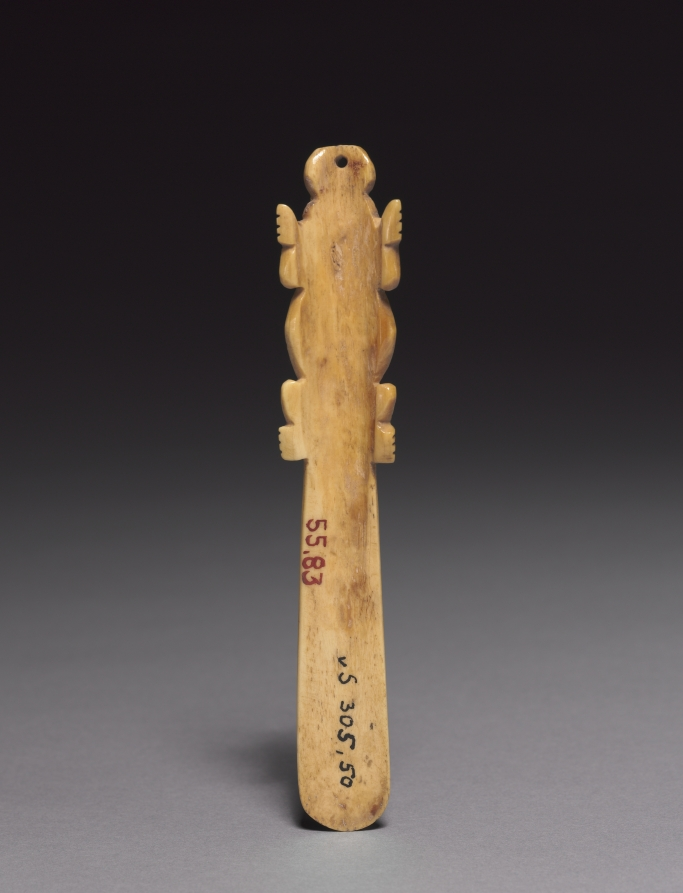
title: Spatula with Carved Lizard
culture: Peru, South Coast, Nasca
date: 100 BCE–700 CE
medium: bone with shell inlay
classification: Sculpture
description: Peruvian Indians today regard coca leaf as a sacred substance that creates communion with supernatural forces. The leaves are chewed with powdered lime that in antiquity was stored in containers and scooped with spatulas like those seen here. Aside from its ritual meaning, coca has practical benefits: it is vitamin-rich; like coffee, it induces clear-headedness; and it increases stamina. The lizard spatula is Nasca in style.